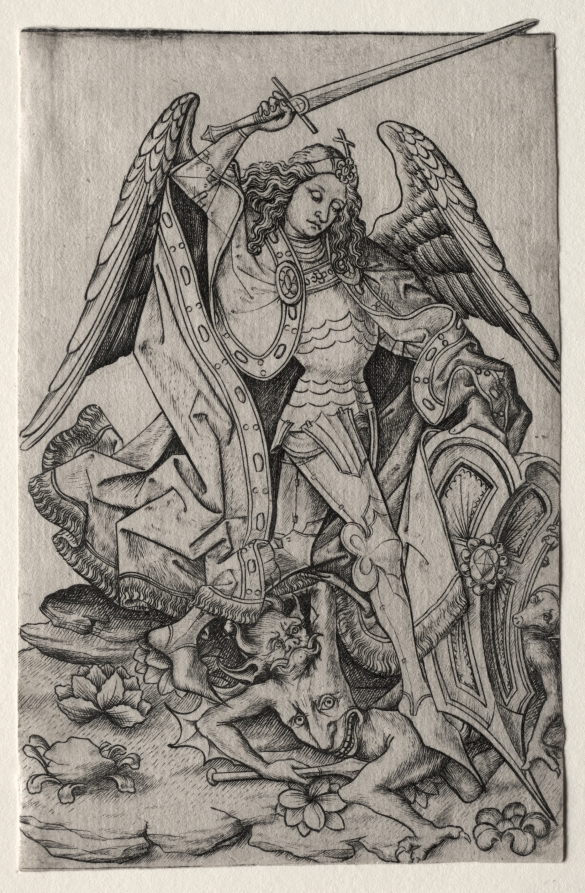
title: Saint Michael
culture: Germany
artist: Master ES (German, active 1450–67)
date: 1450–67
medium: engraving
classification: Print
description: Wearing gothic armor and a spectacular cape, the Archangel Michael prepares to strike down two demons with a broadsword. As the leader of the battle against Satan in Saint John’s vision of the Apocalypse, Michael exemplified the medieval belief that angels fought every day to protect people from sinful temptation, characterized here by the face leering from the devil’s belly directly at the viewer.